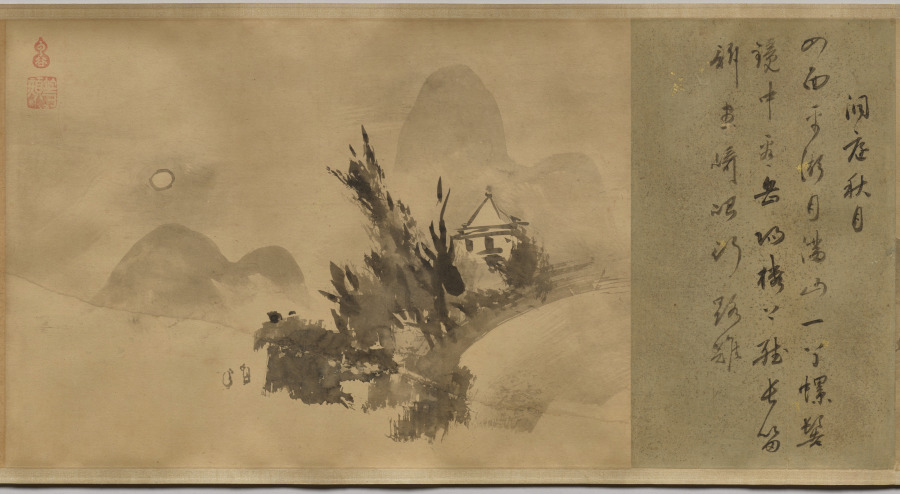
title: Poems and Pictures of the Eight Views of Xiao-Xiang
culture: Japan, Momoyama period (1573–1615)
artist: Unkoku Tōgan (Japanese, 1547–1618)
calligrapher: Inkei Gentetsu (Japanese, 1562–1612)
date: 1605–12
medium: Handscroll; ink on paper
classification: Painting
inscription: Each painting sealed with red gourd-shaped seal reading Unkoku (雲谷) and a square seal reading Tōgan (等顔).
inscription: Each painting prefaced with a titled poem on the Eight Views of Xiao-Xiang by Yujian Ruofen (active late 13th century) inscribed by Japanese Buddhist monk Inkei Gentetsu (1562–1612).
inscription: 右寫玉㵎之筆勢／雪舟末葉等顔筆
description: Unkoku Tōgan brushed these scenes using the splashed-ink technique associated in Japan with the Chinese monk Yujian Ruofen (active late 1200s). Xiao-Xiang refers to the region in present-day Hunan province, where the Xiang River and its tributaries converge. Each of the eight views evokes a time of day or season. The earliest surviving series of Xiao-Xiang paintings is by Wang Hong (active mid-1100s), but textual evidence tells us the theme appears earlier. It was later adopted in Japan and Korea, as seen here. The poems were inscribed by Inkei Gentetsu, the third abbot of the Rinzai Zen temple Tōshunji, Japan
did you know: The “Tō” of Tōgan comes from the name of painter Sesshū Tōyō (1420–1506).